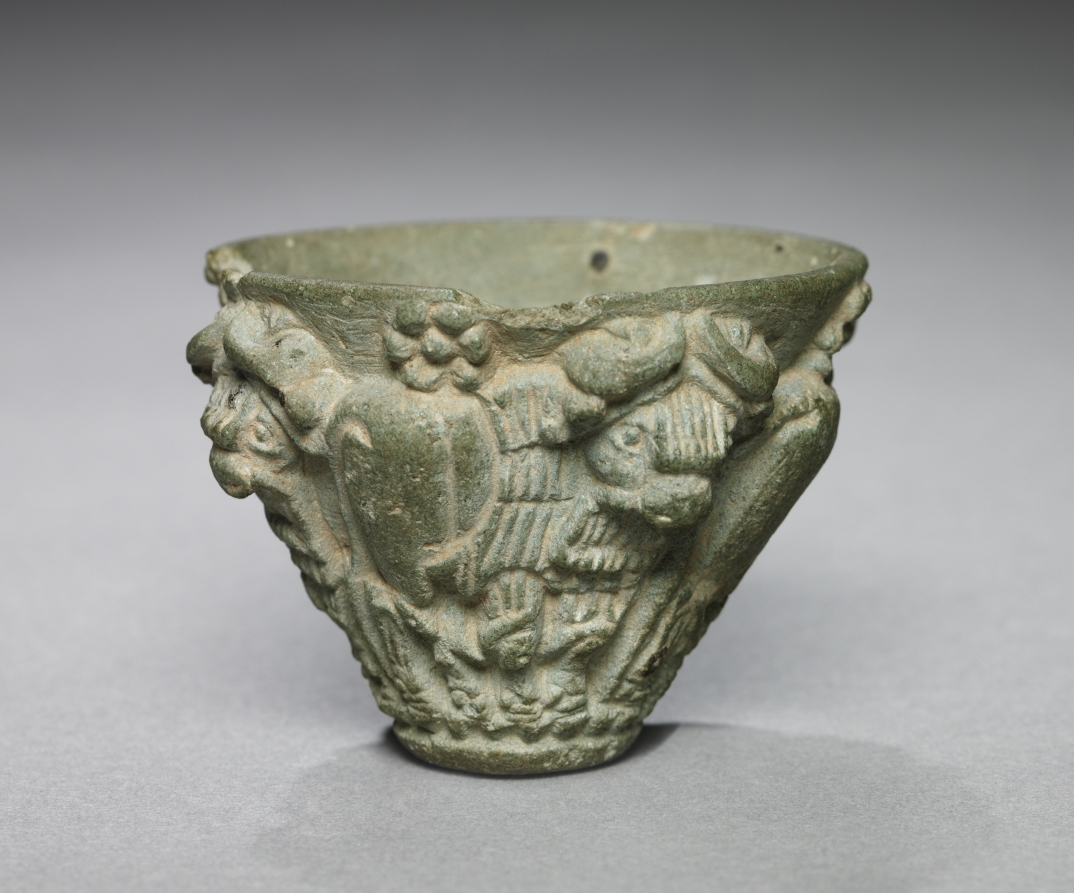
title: Bull Procession Cup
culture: Sumerian, Iraq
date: c. 3100–2900 BCE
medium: gray limestone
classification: Sculpture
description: It was believed that the person who drank from a cup like this magically gained the fertility of the bulls carved on its surface.